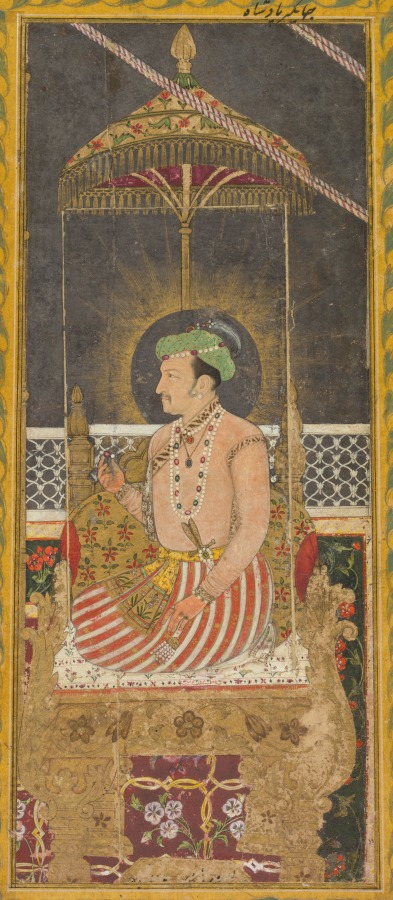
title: Posthumous portrait of Emperor Jahangir under a canopy (recto); Calligraphy (verso)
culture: India, Mughal, 17th century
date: c. 1650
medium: Gum tempera, ink, and gold on paper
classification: Painting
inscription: recto: Persian inscription above, in inner border, in nasta‘liq script: Great King Jahangir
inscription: verso: Persian verse in nasta‘liq script: The Feast is approaching, and I am dying for/ Your coquetry to make a sacrifice of me./ Do not hold back from killing me:/ For that very wish I have given up my soul.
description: Jahangir, the fourth Mughal emperor, was remembered for his greatness long after his death. Ruling from 1605 to 1627, he laid the foundations for long-term trade and diplomatic relations with various nations of Europe, most notably England and Portugal. He oversaw the transition of Mughal India into a global power during a time that can be considered the international Age of Exploration. This posthumous portrait depicts Jahangir amid the trappings of wealth and power with the light of divine sanction shining behind his head. A white marble railing demarcates his imperial space.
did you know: Jahangir holds a ruby or spinel, thought to be a talisman for military victory.